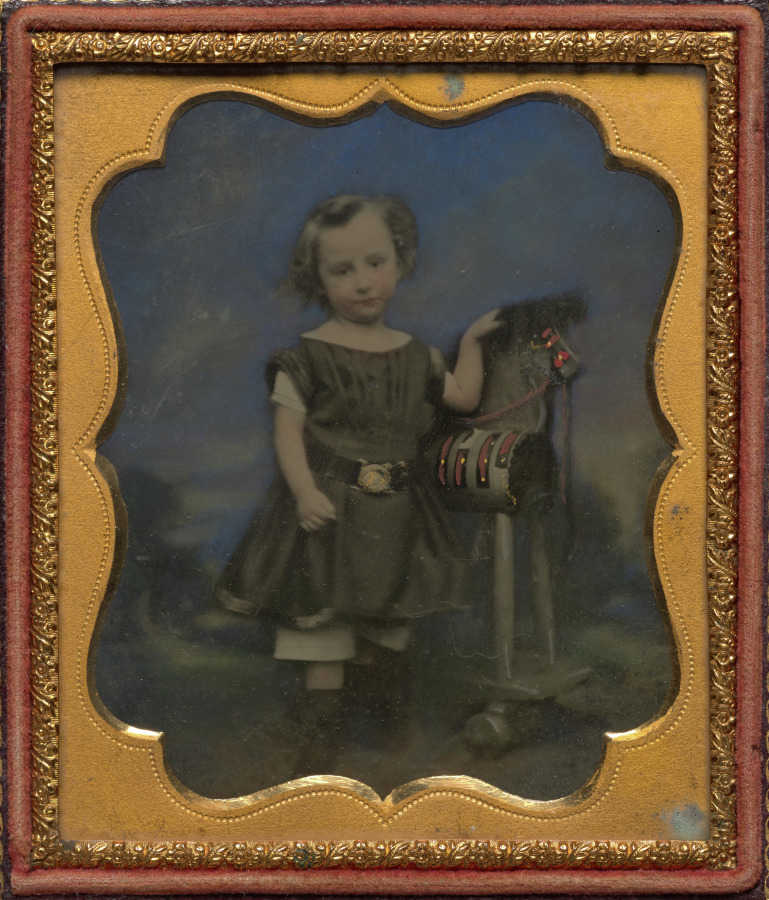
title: Boy with hobby horse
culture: America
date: c. 1862–65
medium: ambrotype, tinted, sixth plate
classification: Photograph